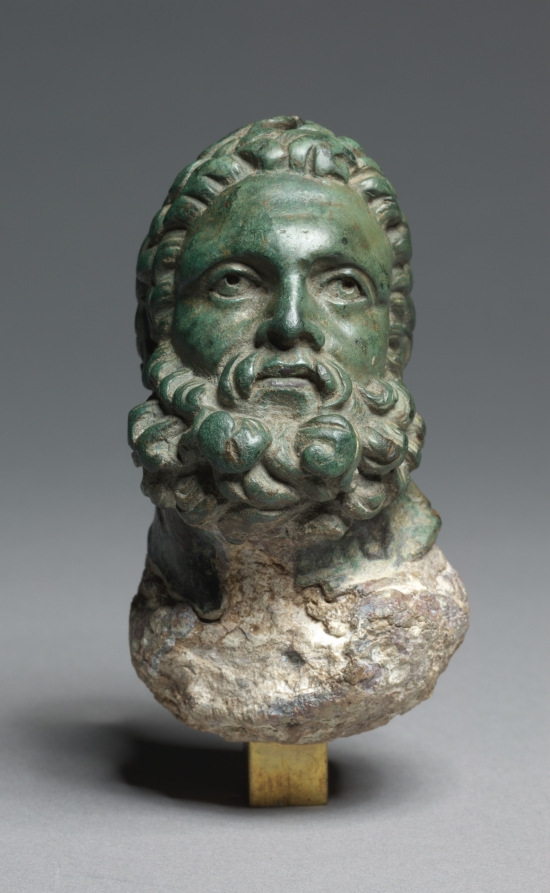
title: Head of Herakles Refashioned as a Weight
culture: Greece, Hellenistic period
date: 300–200 BCE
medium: bronze filled with lead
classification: Sculpture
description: Even without his club or lion skin, the short curly hair and full curly beard identify this miniature head as that of Herakles. The eyes and mouth were likely once inlaid. His upward gaze suggests the head may be based on the Herakles Epitrapezios by Lysippos, the personal sculptor of Alexander the Great. The original Herakles Epitrapezios survives only through copies, including this one as well as a slightly later marble version also in Cleveland (among many others). This head was refashioned into a weight, probably in the Roman period, by filling it with lead and adding holes for a hook.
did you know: Romans filled their weights with lead because it was plentiful, cheap, and easy to shape.